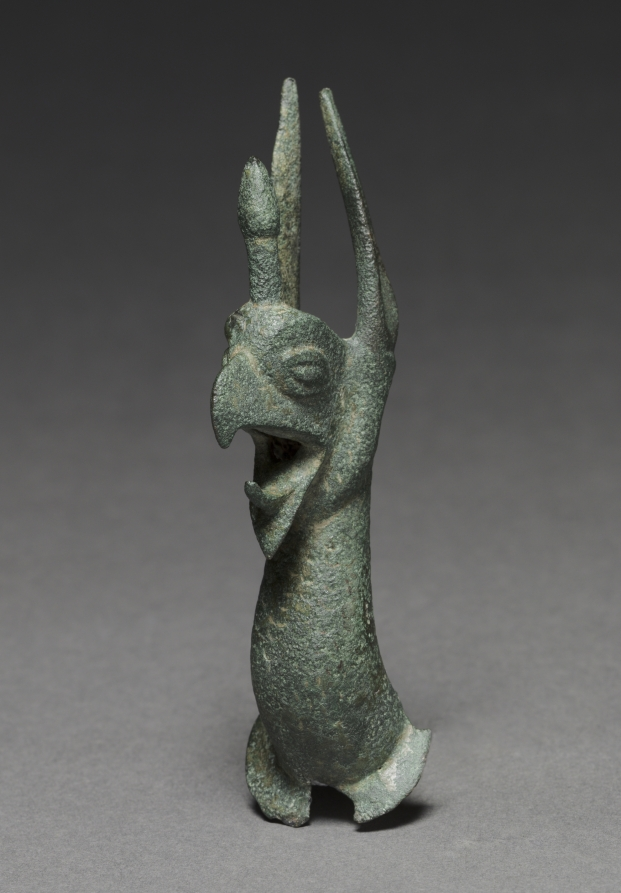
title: Griffin Protome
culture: Greece, Ionian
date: 625–575 BCE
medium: bronze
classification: Metalwork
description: This bird-like head and neck, with sharp beak and tongue, belongs to a griffin, a fantastic bird/lion hybrid prominently found in both Greek and Near Eastern artwork. Often, as here, the griffin has large upright ears (probably feline, in keeping with its lion body) as well as a knob-like projection atop its head. The scaly neck terminates in a flange once pierced with holes for connection to the shoulder of a large bronze cauldron, which would have been ornamented with three or more such griffins.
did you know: Fossilized Protoceratops dinosaur bones may lie behind the eagle/lion form of the mythical griffin.